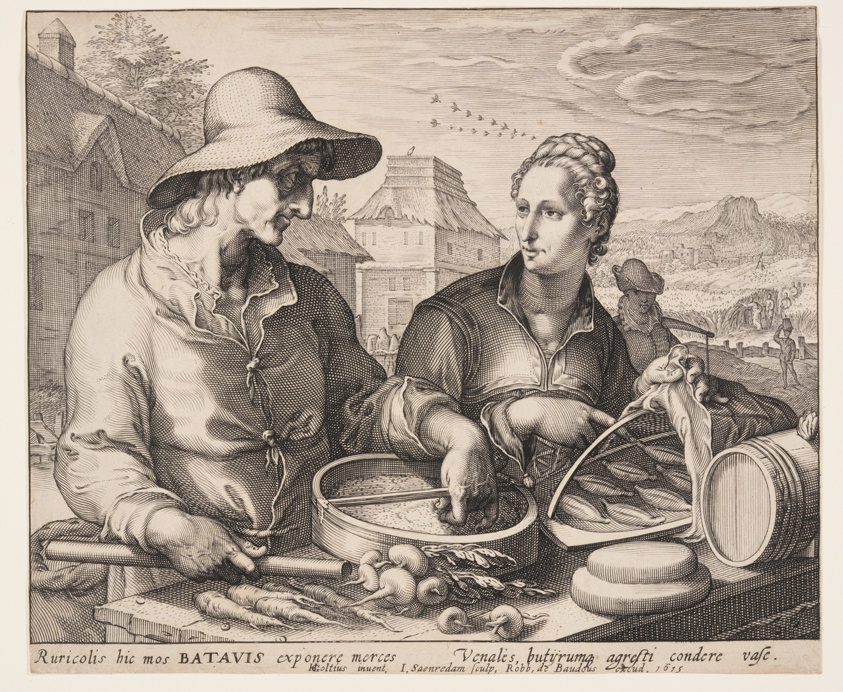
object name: Print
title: Farmer and His Wife at Market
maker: Jan Saenredam (Dutch, 1565–1607); after Hendrick Goltzius (Dutch, 1558–1617)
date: 1615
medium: Engraving on laid paper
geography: Netherlands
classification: print; engraving; paper; prints and drawing